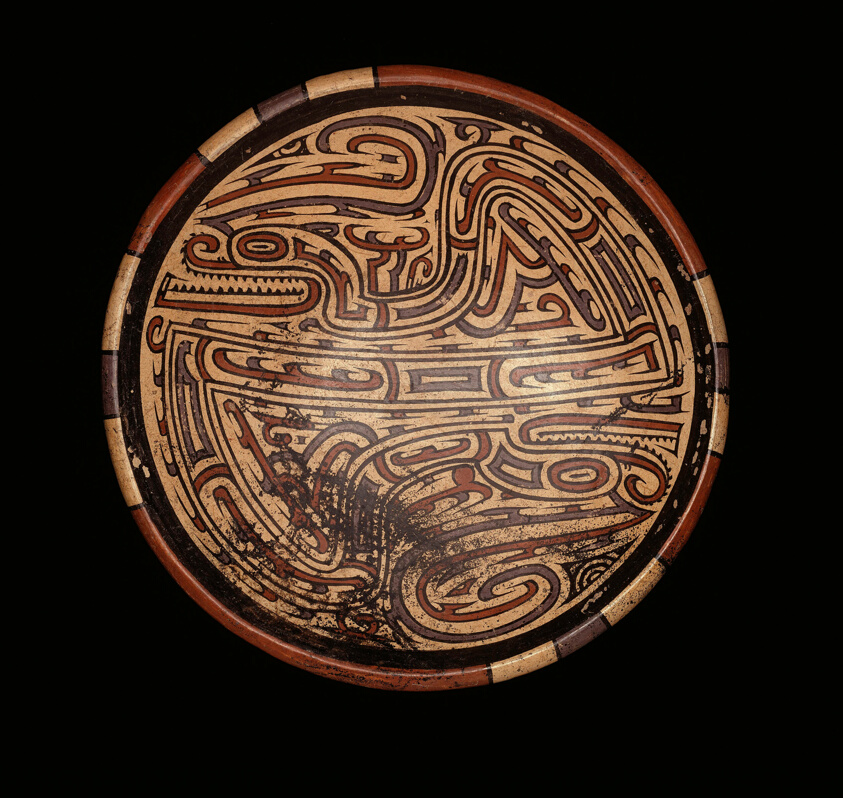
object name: Vessel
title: Pedestal Bowl Depicting Bicephalic Footed Serpent with Headcrest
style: coclé, Pre-Columbian, americas, lower central america, Arts of the Americas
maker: Coclé (Possibly Los Santos province, Panama)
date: 700–1100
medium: Ceramic and pigment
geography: Los Santos province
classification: vessel; earthenware; bowl; ceramics; art of the americas; vessel for serving food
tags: serpents, animals, abstract figures, composite, iguana